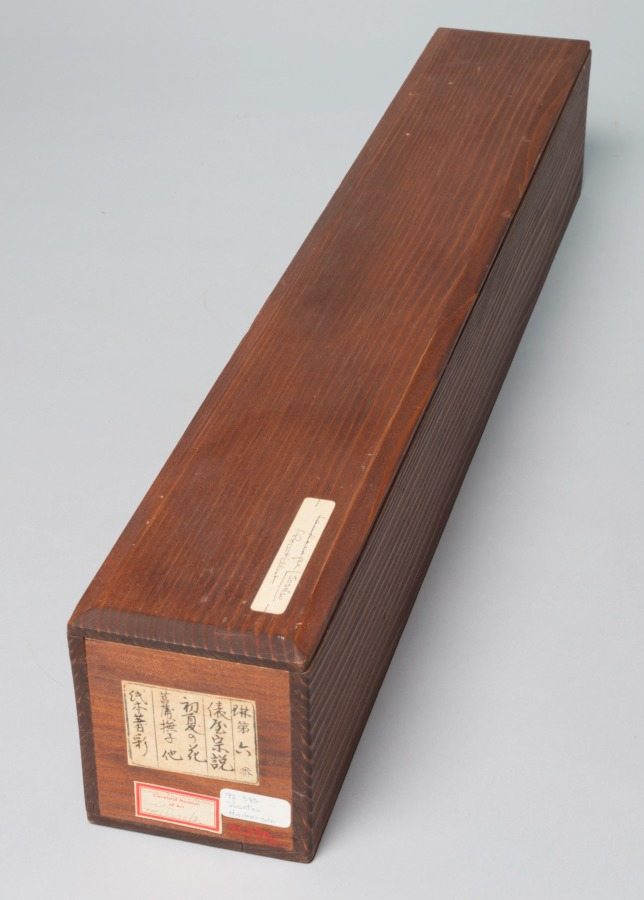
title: Summer Flowers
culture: Japan, Edo period (1615–1868)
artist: Kitagawa Sōsetsu (Japanese, active 1639–50)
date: mid-1600s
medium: hanging scroll; ink, color, and gold on paper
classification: Painting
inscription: 法橋相説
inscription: Seal: 印年 (Inen)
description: White hydrangea, orange-colored demon’s lantern, and greenbrier vine appear together in this scroll. The artist used the dripping-in (tarashikomi) technique to create a sense of depth and dimension in the leaves of the plants. A carefully controlled brush loaded with a high ratio of water to ink or color is key to the success of this brush method. Gold lines indicate the veins of leaves and the seams of pods.